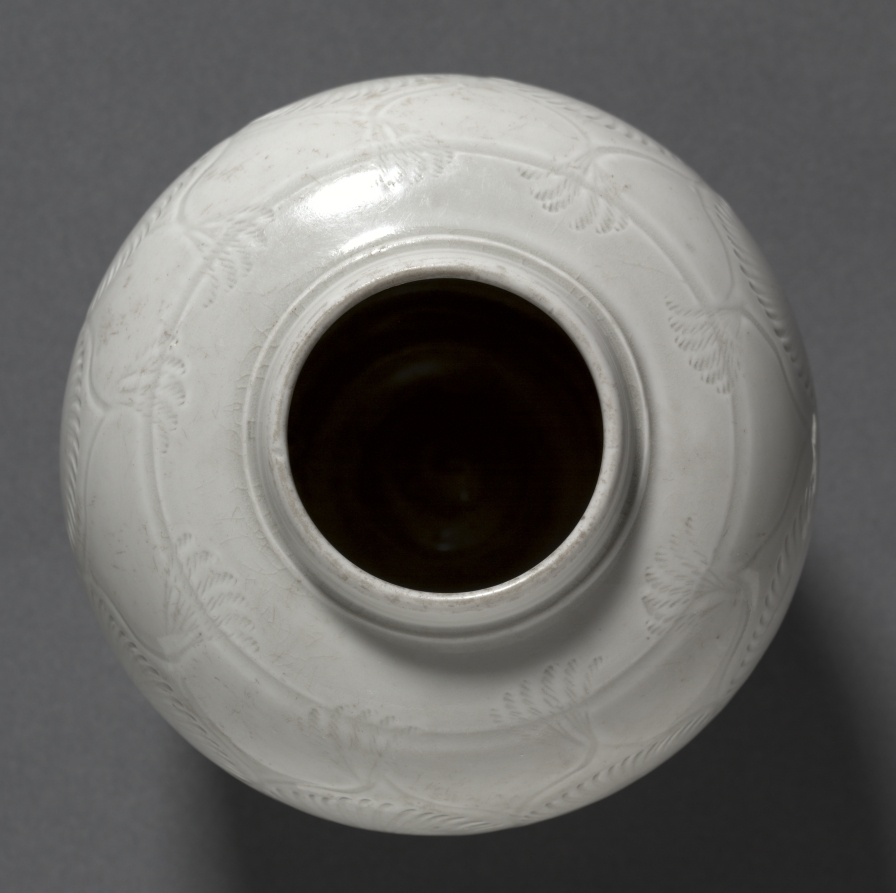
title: Jar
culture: Northeast China, Liao dynasty (916-1125)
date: 900s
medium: white porcelain with combed and incised decoration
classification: Ceramic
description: This finely potted vessel has an off-white porcelain body covered with a transparent glaze, giving an overall warm white color. A lattice of foliage patterns is combed and incised in the clay; the bold, uninhibited decoration interacts with the compact ceramic form and the subtle glazing to give it a special aesthetic appeal.